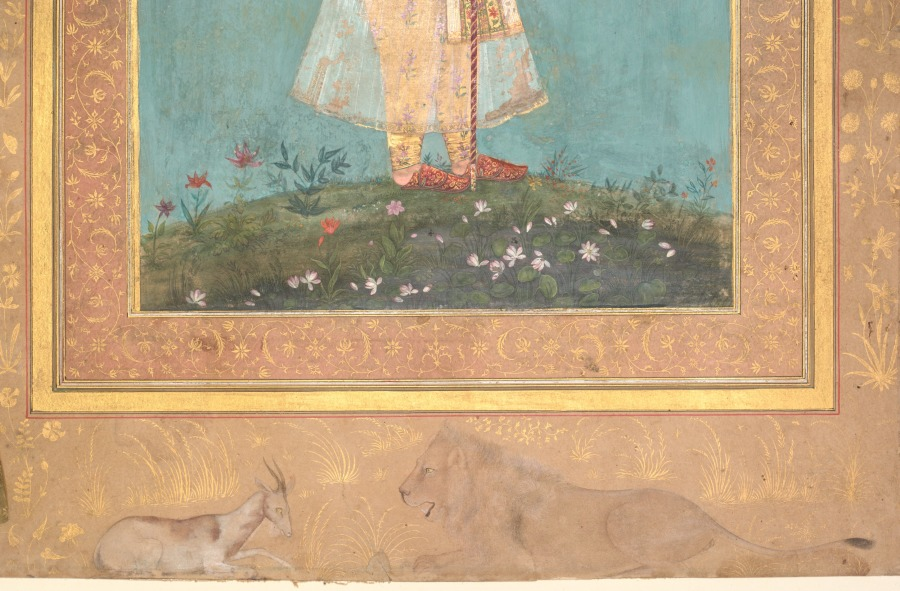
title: Shah Jahan holding a spinel and a long Deccan sword, from the Late Shah Jahan Album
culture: India, Mughal, 17th century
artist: attributed to Hashim (Indian, active 1598-c.1650)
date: c. 1650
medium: Gum tempera and gold on paper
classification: Painting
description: This page came from an imperial album assembled for Shah Jahan toward the end of his reign. Only portraits of the emperors have angels hovering with a crown in the top border along with the predator peacefully paired with his prey below. Shah Jahan chose to link these symbols of peace and justice with divine sanction for his rule, as indicated by the light of the sun and moon behind his head. Royal retainers carry emblems of sovereignty in the left border. Imperial Mughal painting reached a pinnacle of refinement and formality under Shah Jahan. The artists reveal astonishing skill in their ability to render the subtle texture of the feather in his turban crest, the gleam of every jewel, the softness of his beard, and the delicacy of his costly translucent muslin robe. In his hand Shah Jahan holds a ruby-like gemstone called a spinel, prized among the Mughals for its talismanic properties of protection during battle.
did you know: The finest fabric was the most transparent, like the Emperor’s New Clothes.